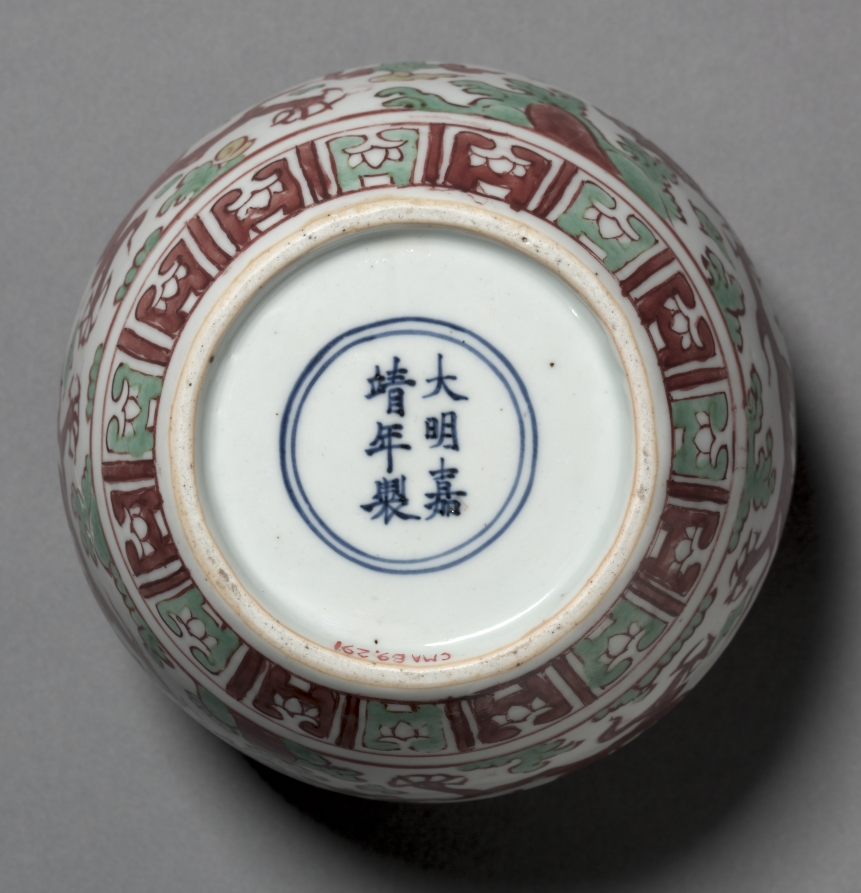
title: Jar with Dragons Pursuing Flaming Jewels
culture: China, Jiangxi province, Jingdezhen kilns, Ming dynasty (1368-1644), Jiajing mark and reign (1522-66)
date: 1522–66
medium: procelain with wucai (five color) overglaze enamel decoration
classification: Ceramic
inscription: 大明嘉靖年製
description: The exterior of this jar is ornamented with two rampant five-clawed dragons boldly drawn in rouge de fer. The dragons are in pursuit of the sacred jewel amid cloud scrolls in green and yellow, flanked at the top and bottom with broad registers of cloud scrolls and gadroons. The underfoot is glazed and bears a six-character nianhao in the form of a vertical mark reading "Daming Jiajing nianzhi," enclosed in double rings in underglaze cobalt blue.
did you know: The interior is glazed white porcelain.